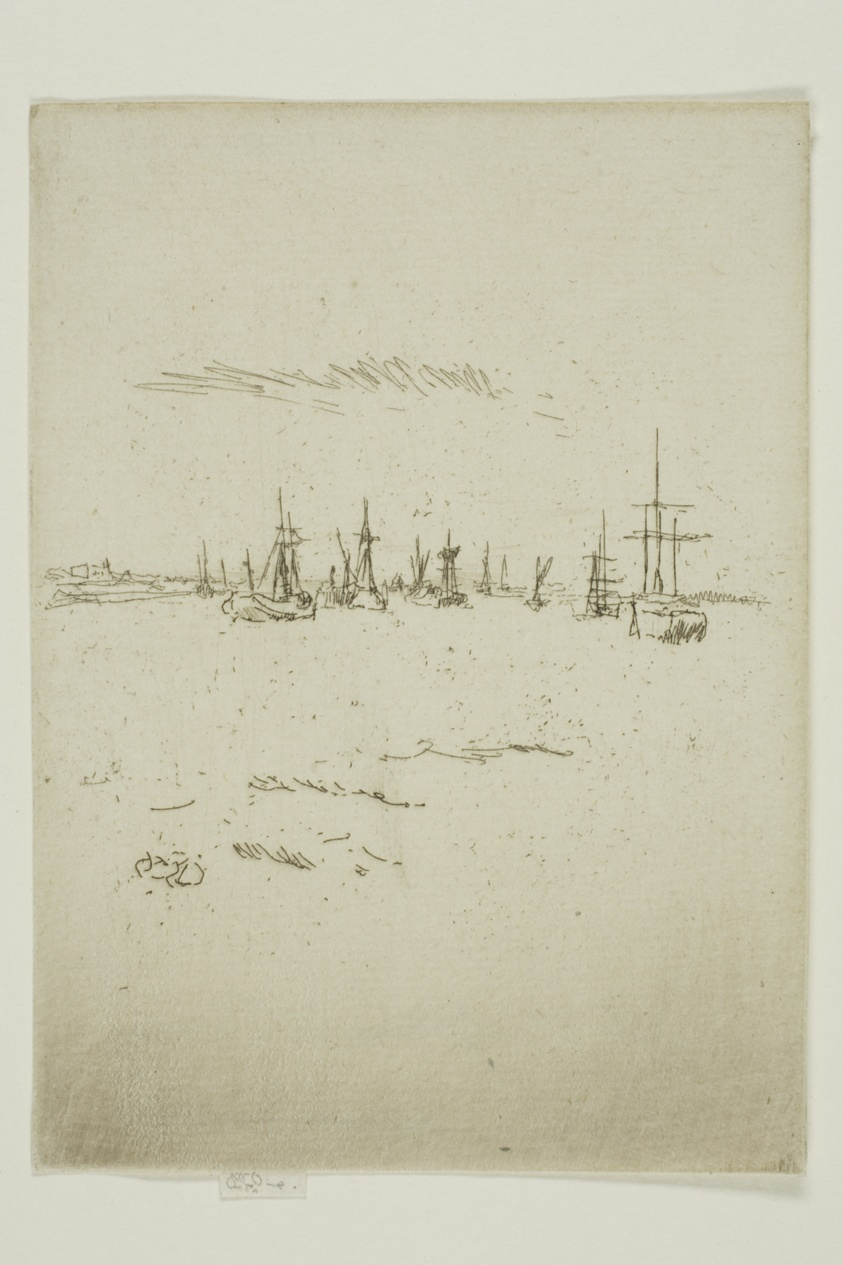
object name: Print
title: Return to Tilbury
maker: James McNeill Whistler (American, 1834-1903)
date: 1887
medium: Etching and drypoint with foul biting in black ink on cream laid paper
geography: United States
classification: etching; foul biting; print; prints and drawing; drypoint; paper